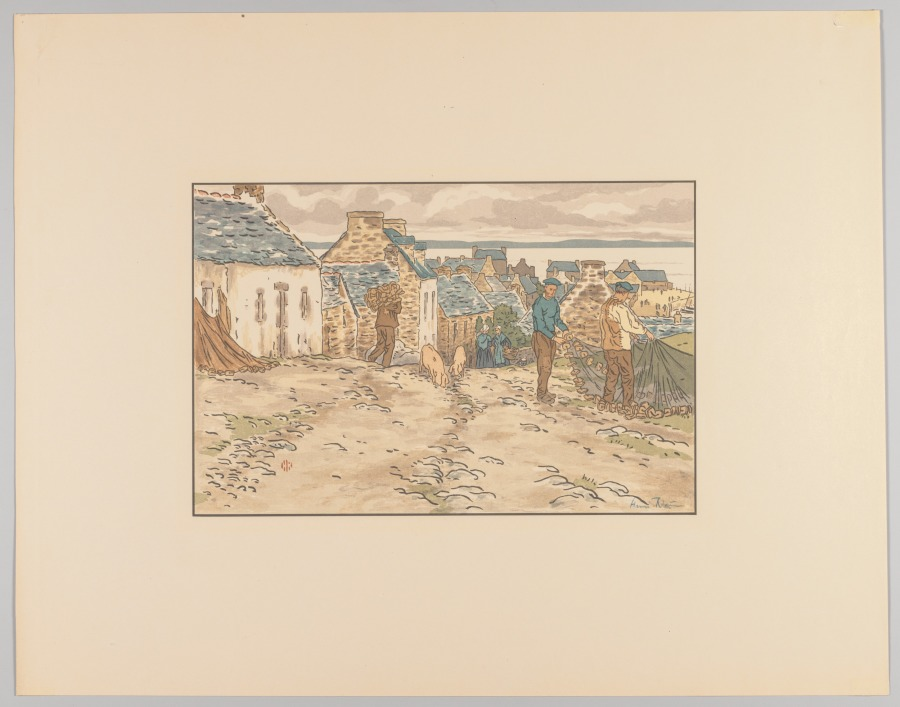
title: The Beautiful Countryside in Brittany: Street in Tréboul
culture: France, 19th century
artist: Henri Rivière (French, 1864–1951)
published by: Printed by Eugene Verneau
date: 1898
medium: color lithograph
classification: Print